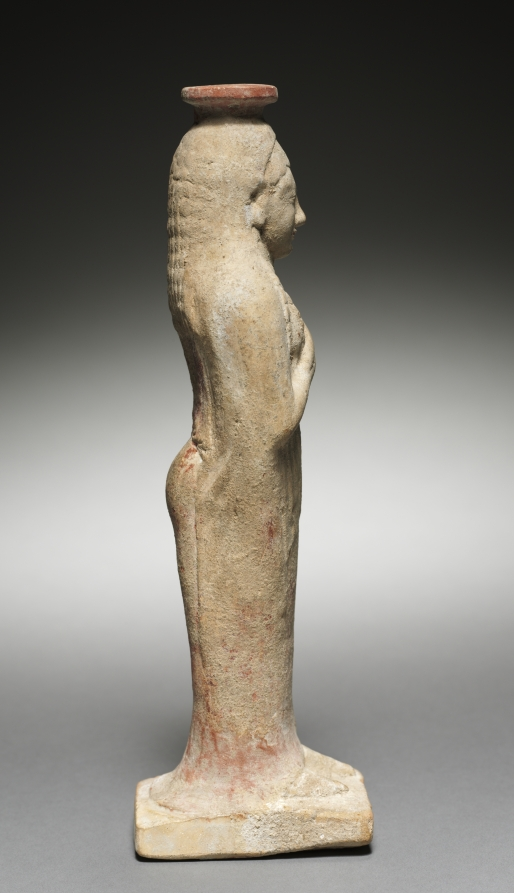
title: Kore-Shaped Perfume Flask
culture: Greece, Rhodes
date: 525–500 BCE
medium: terracotta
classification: Sculpture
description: Mold-made in the form of a standing maiden, or kore, this vessel likely once held expensive perfumed oil. The figure, who might represent the goddess Aphrodite, holds a dove by her chest with one hand, and her pleated drapery in the other. Traces of red pigment hint at a much more vibrant original appearance.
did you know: In ancient Greece, doves were symbols of beauty and love, associated with the goddess Aphrodite.